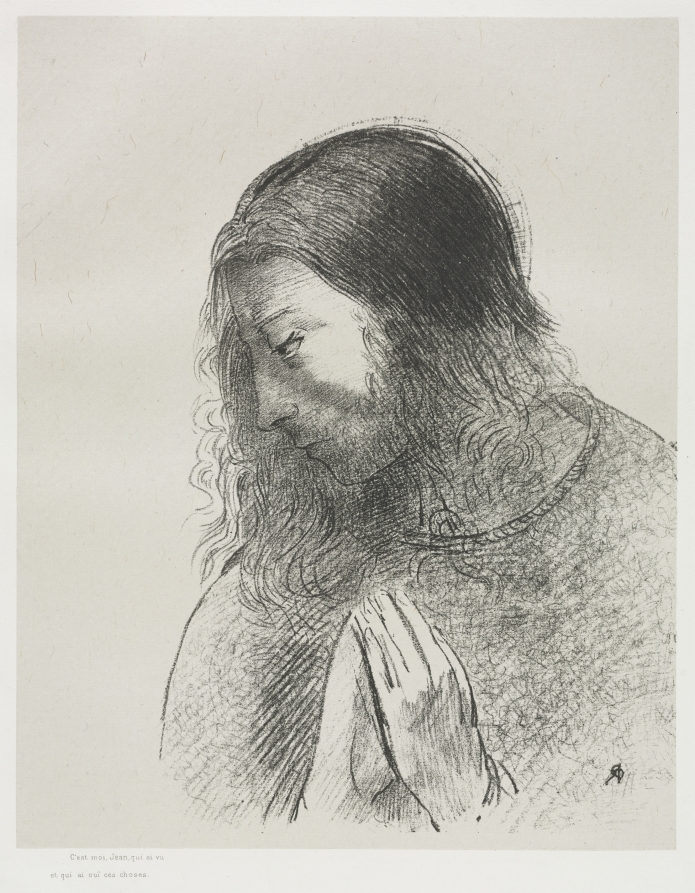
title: And I John Saw These Things, and Heard Them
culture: France, late 19th Century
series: The Apocalypse of Saint John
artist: Odilon Redon (French, 1840–1916)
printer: Blanchard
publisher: Ambroise Vollard (French, 1867–1939)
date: 1899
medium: lithograph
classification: Print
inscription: initialed on stone at lower right: OR; printed at lower left, below image: C'est moi, Jean, qui ai vu / et qui ai ouï ces choses.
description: The last of Odilon Redon’s 11 lithographic portfolios, this series relates to the Book of Revelation from the Christian Bible. The subject had been explored throughout art history, allowing the artist to align himself with past masters, such as Albrecht Dürer. Although Redon often vaguely referenced texts, these prints directly illustrate 12 individual passages, including one about a woman clothed with the sun and another focused on a great star falling from heaven. By the time he created this portfolio, Redon’s reputation was well established. The project was published by art dealer Ambroise Vollard, who began to sell and promote Redon’s work about a year earlier, building a market for his prints in Paris and abroad.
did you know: This is one of the last works where Redon experimented with lithograph and all-black medium. In contrast, bright, dazzling colors characterize his late works.